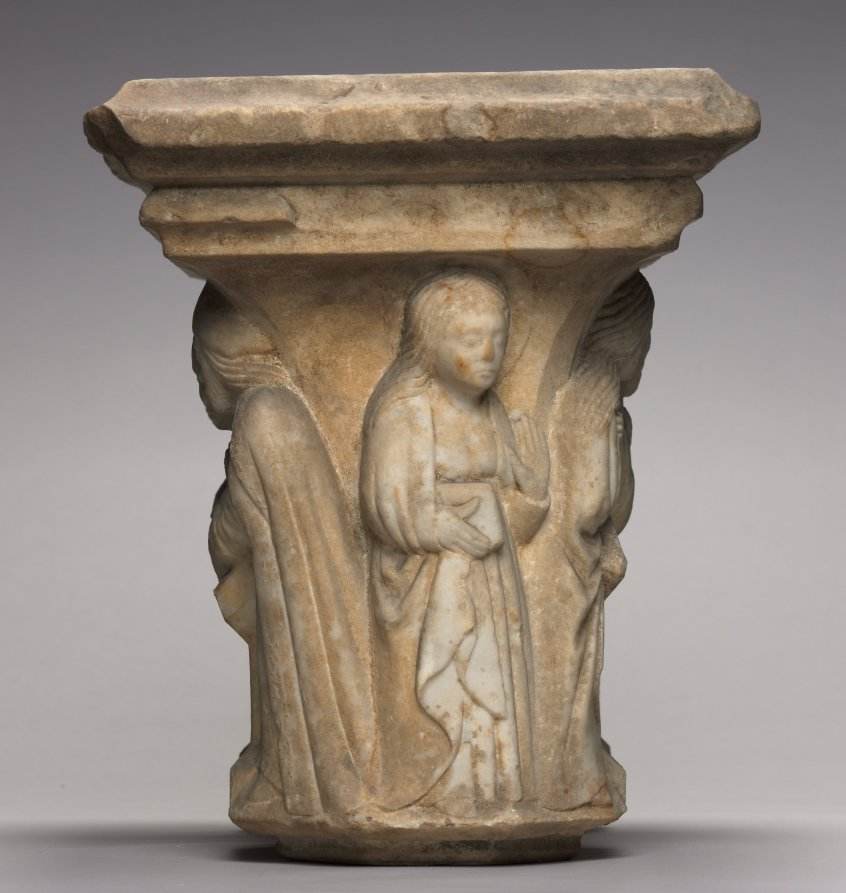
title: Engaged Capital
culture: Southern France, Abbey of Larreule, near Tarbes, 15th century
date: 1400s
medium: limestone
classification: Sculpture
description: This capital belongs to a surviving group including other architectural fragments that once decorated the cloister of the Abbey of Larreule. A cloister was a covered walkway or arcade, usually around all four sides of a square area of grass (the "cloister garth"). The seclusion of the cloister was the monks’ exclusive domain, off limits to others. Here, the monks were supposed to pray, study, meditate, and exercise in privacy and solitude. Such cloister capitals served both to instruct the monks and as a focus for their devotions. Other capitals in this series are installed in the Jardin Massey at Tarbes, near the original abbey. An arch from Larreule has been assembled with other associated French capitals at The Cloisters in New York.